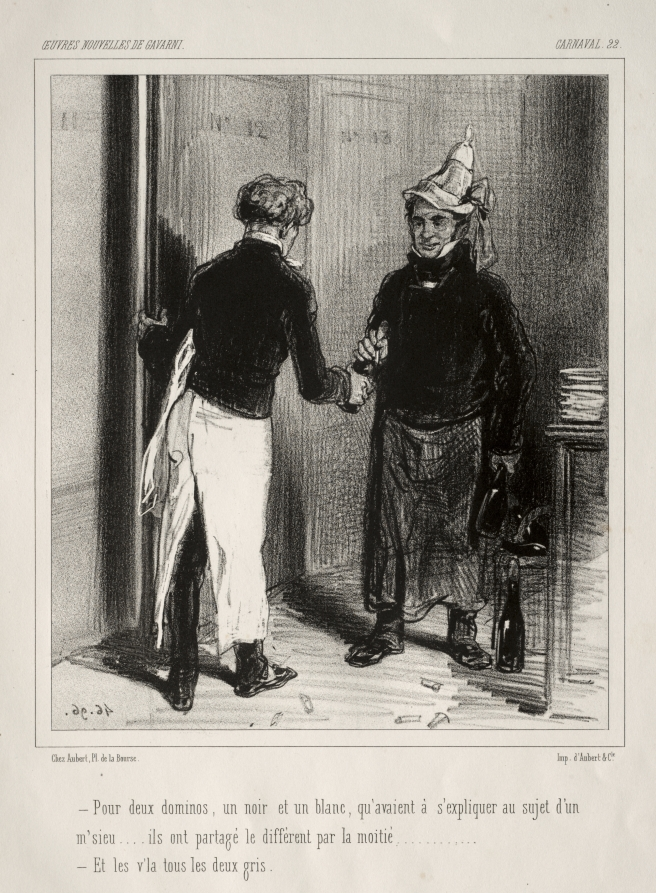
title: Carnaval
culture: France, 19th century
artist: Paul Gavarni (French, 1804–1866)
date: c. 1841–47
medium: lithograph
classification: Print